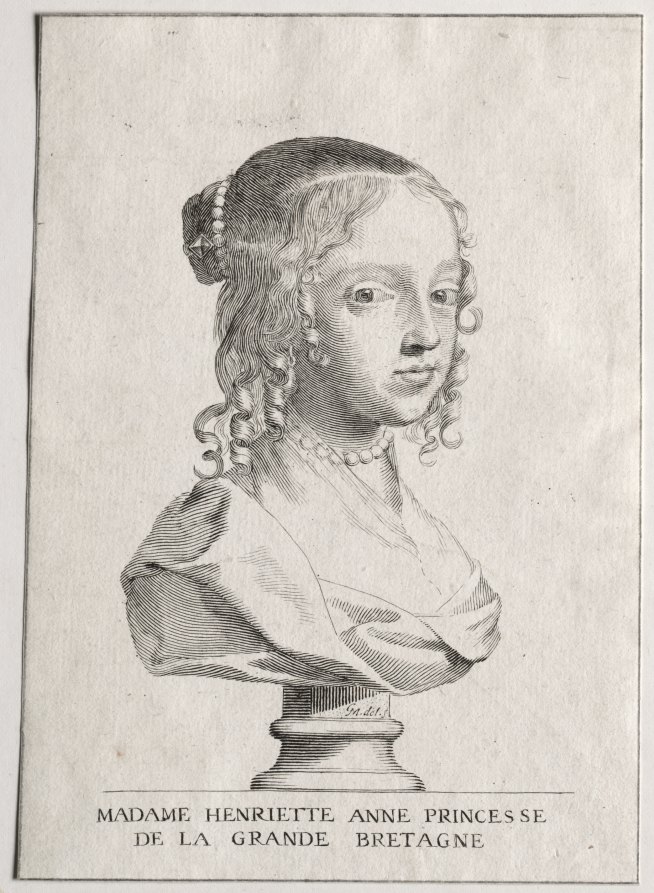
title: Henriette-Marie d'Angleterre, duchess d'Orleans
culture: France, 17th century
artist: Claude Mellan (French, 1598–1688)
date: 1655–61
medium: engraving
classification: Print